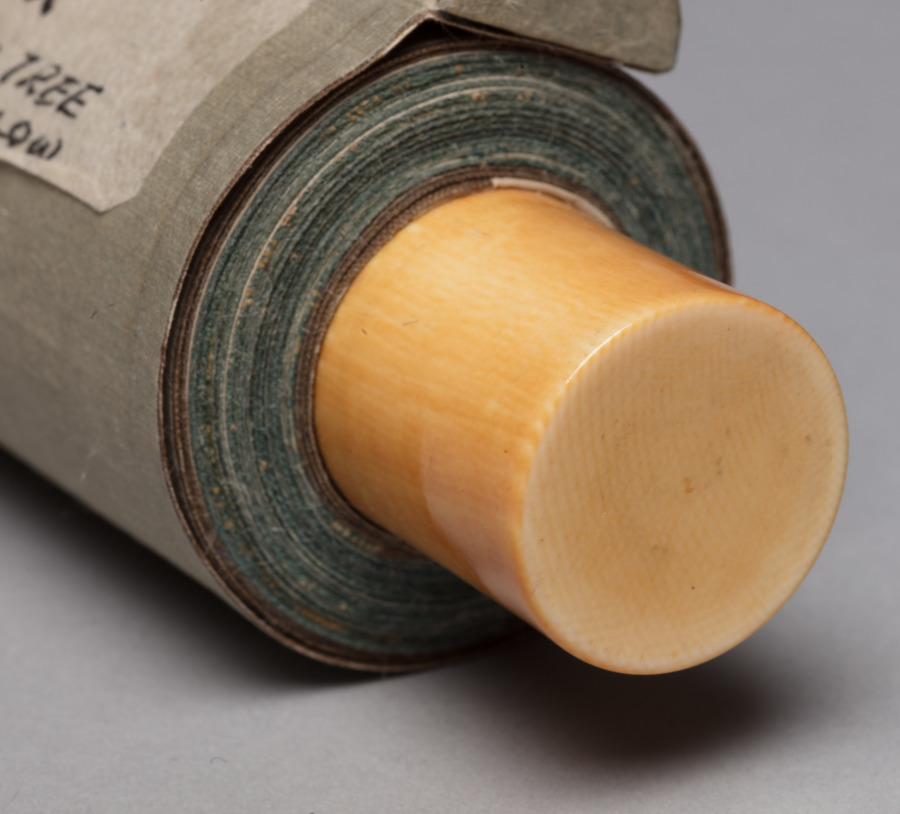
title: Calligraphy with Willow and Swallows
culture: Japan, Muromachi period (1392–1573)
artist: Ikkyū Sōjun (Japanese, 1394–1481)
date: 1400s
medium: hanging scroll, ink on paper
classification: Painting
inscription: How many days has it rid itself of the crow’s cloth? It knows not!/ Lovely is its body so nimble and neat./ Neither men of wealth, courtly position, or power can come close to the unfettered, noble swallow!/ With the coming of spring, it seems to be flying about, dancing around the grass hut of the foolish Priest. signed: Unkasō Isshi Tōkai jun Ikkyū shi ga ippitsu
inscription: outer box inscribed: Ikkyū Ōshō Enshi-zu Jigasan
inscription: inner box side lid inscribed: Showa 50 (1975), November by Tayama Honan with kao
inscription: Inner box side lid inscribed: Ikkyū Ōshō Bokuseki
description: The famed Buddhist monk Ikkyū is best remembered for his calligraphy. Calligraphic conventions of his time called for brushwork that did not vary much in style from character to character. However, as Ikkyū’s lines progress, his brushwork wanders between standard script and a sort of shorthand, marked by an uneven distribution of ink and a reduction of the characters to only the most necessary strokes. Ikkyū’s direct communication of emotion via brushwork became characteristic of the works produced by monks affiliated with the temple Daitokuji later in the Edo period (1615–1868).